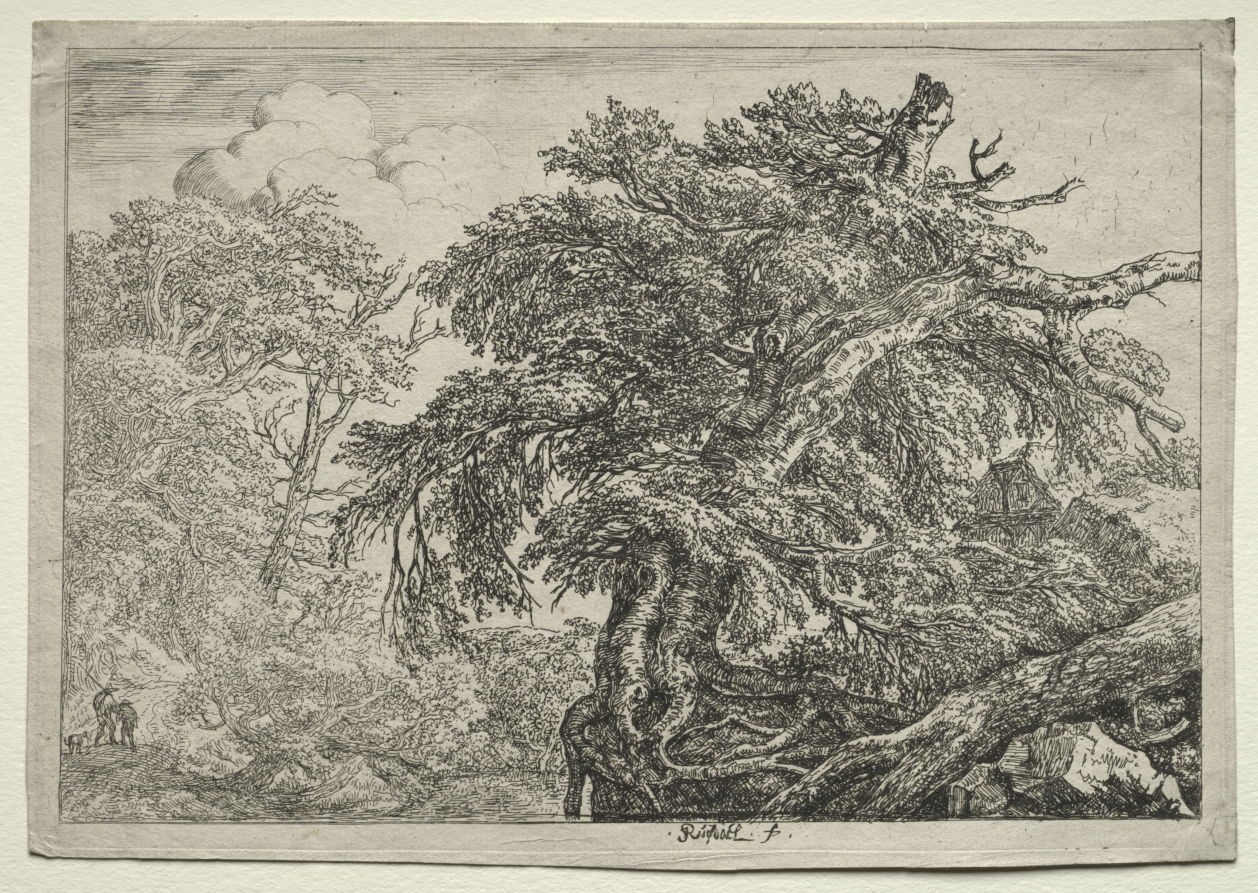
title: Two Peasants and their Dog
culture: Netherlands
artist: Jacob van Ruisdael (Dutch, 1628/29–1682)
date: c. 1650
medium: etching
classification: Print